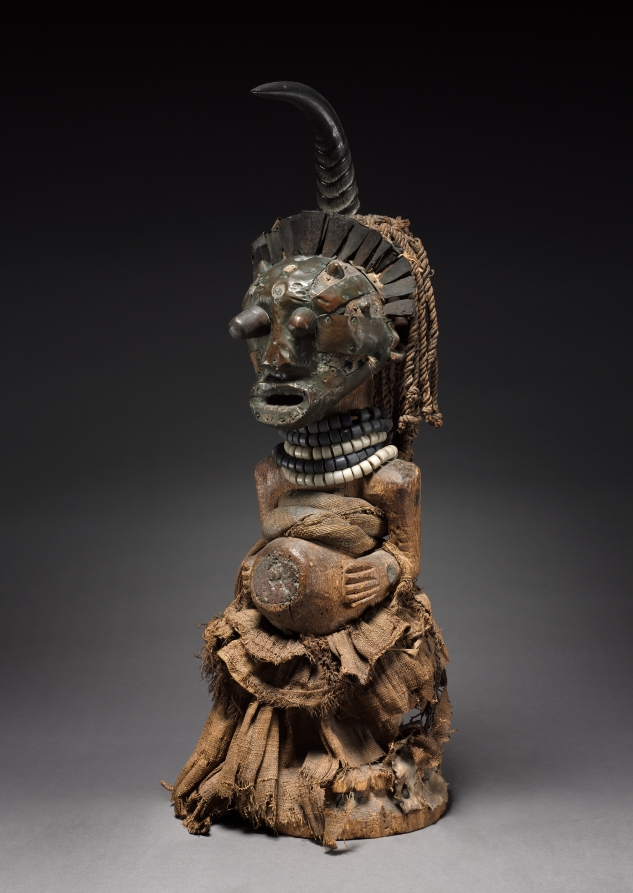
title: Male Figure (nkishi)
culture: Africa, Central Africa, Democratic Republic of Congo, Songye-style carver and nganga (priest)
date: late 1800s–early 1900s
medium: Wood, glass beads, brass (including upholstery studs), copper alloy, iron alloy, raffia, reedbuck antelope horn, rawhide, animal hair, human teeth, organic material, minerals, and plant fibers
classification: Sculpture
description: This figure's visual impact and workmanship suggest that an extended family––rather than an individual––used it. The raffia skirt around the waist and the blue and white beads are indicators of leadership. The metal appliqué covering the face and the metal blades that hedge the headgear refer to the blacksmith, a culture hero celebrated in a Songye myth narrating the formation of the state. The metal strips on the skeletal face are said to relate to lightning, signaling the figure's role as a powerful anti-sorcerer, but the contrast between white iron and red copper symbolically alludes to the ambivalent powers of the figure.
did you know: Researchers conducted X-ray scanning on this figure, revealing its internal structure and human teeth, an antelope horn, and animal hair.